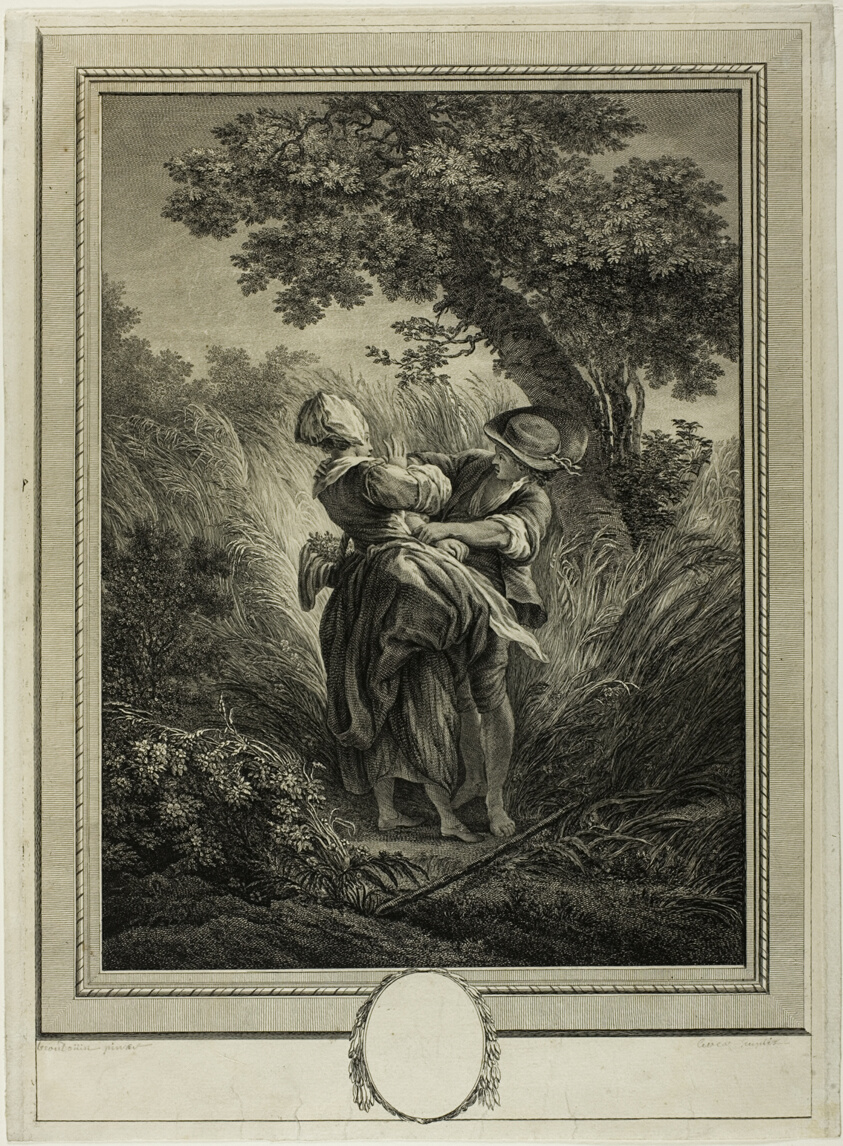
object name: Print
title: Dangerous Encounter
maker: Jean Jacques Andre Le Veau (French, 1729-1785); after Pierre Antoine Baudouin (French, 1723-1769)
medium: Etching on ivory paper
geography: France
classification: etching; print; prints and drawing